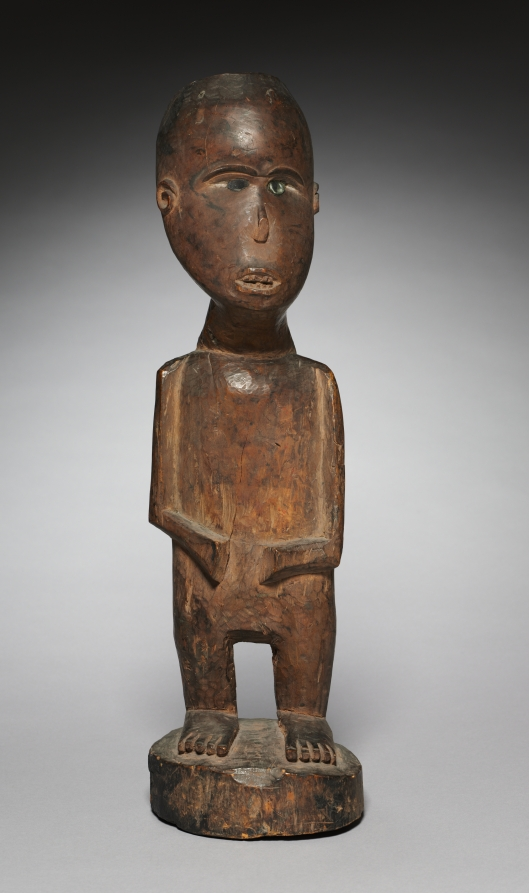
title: Male Figure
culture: Central Africa, Democratic Republic of the Congo, Kongo or Vili, early 19th century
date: early 1800s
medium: Wood, iron, and metalized glass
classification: Sculpture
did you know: This work has a paper label indicating it was exhibited in the 1857 Art Treasures of Great Britain in Manchester, England.